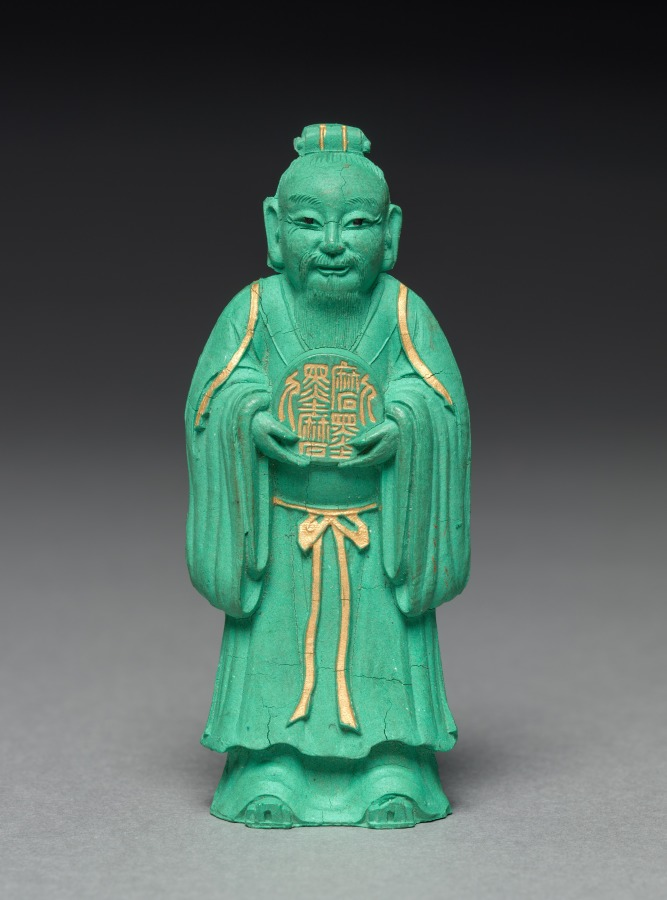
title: Ink Cake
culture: China, Qing dynasty (1644-1911)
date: late 19th Century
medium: ink cake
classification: Miscellaneous